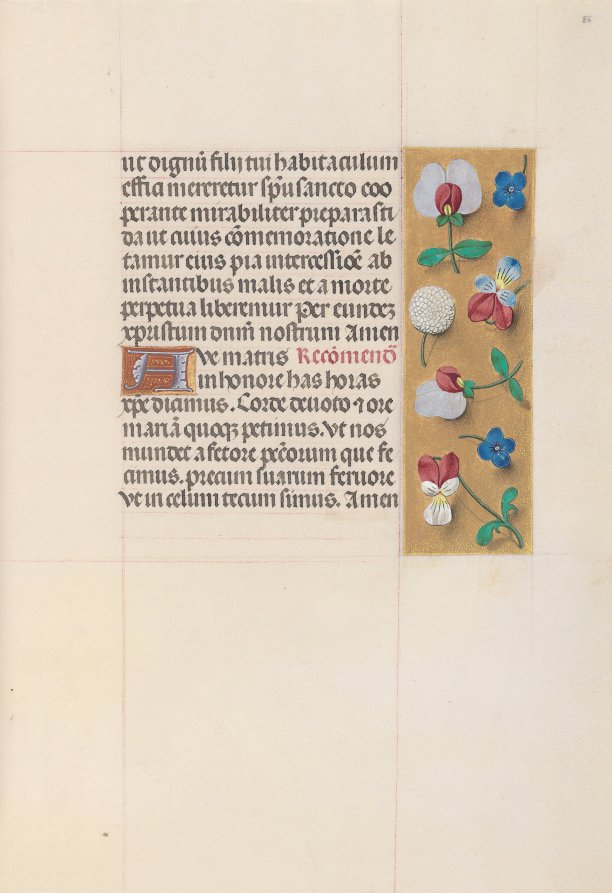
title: Hours of Queen Isabella the Catholic, Queen of Spain: Fol. 86r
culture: Flanders, Ghent and Bruges, late 15th century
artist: Master of the First Prayerbook of Maximillian (Flemish, c. 1444–1519)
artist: and Associates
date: c. 1500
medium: ink, tempera, and gold on vellum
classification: Bound Volume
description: This manuscript was illuminated by a circle of at least five highly organized manuscript painters active in the Flemish cities of Ghent and Bruges. The principal illuminator was Alexander Bening, who painted the majority of the book's miniatures. Manuscripts produced by this circle of artists are renowned for the decoration of their borders, which typically feature a rich variety of realistically-painted flowers, birds, and butterflies. This prayer book, called a book of hours, was intended not for a cleric, but for the private devotions of a lay person-in this case, Isabella the Catholic, Queen of Spain (1451-1504). Isabella's coat of arms embellishes the book's frontispiece. It is unlikely that the book was commissioned by the Queen herself; rather, she probably received it as a diplomatic gift from someone courting her patronage, perhaps Cardinal Francisco Jimenez de Cisneros. A Franciscan friar, Jimenez was dependent upon Isabella for his advancement, first to the post of Queen's confessor in 1492, and then to Archbishop of Toledo in 1495.